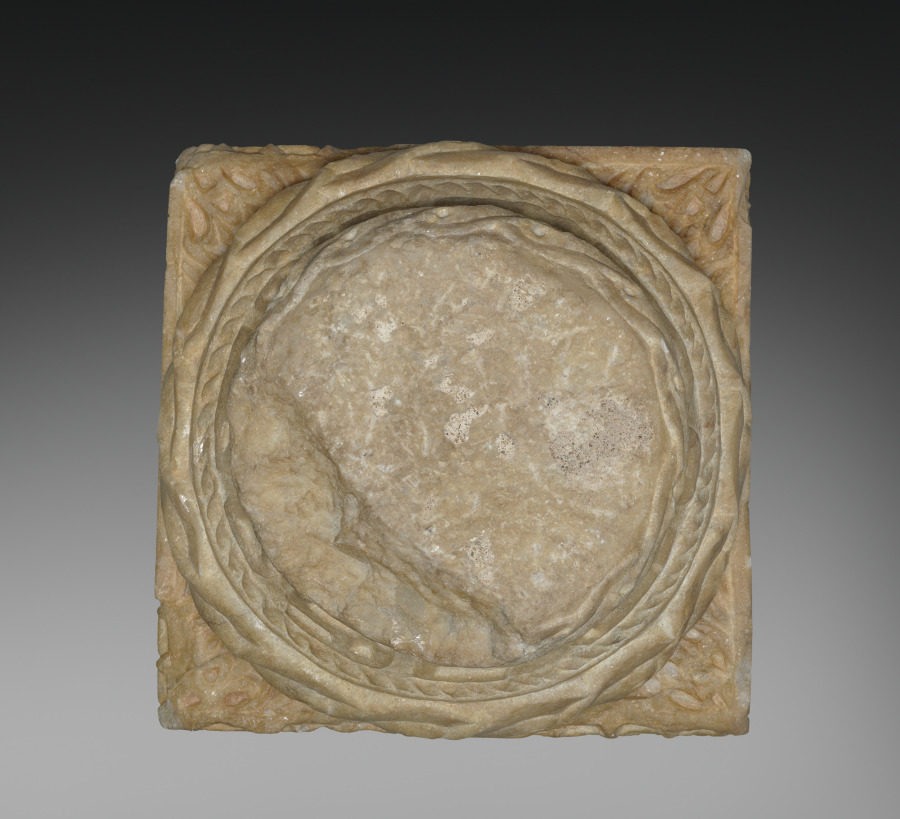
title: Column Base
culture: Spain, Cordoba, Spanish Umayyad period (756–1031)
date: c. 960–76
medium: Marble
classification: Sculpture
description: This base comes from the palatial city of Madinat al-Zahra near Cordoba (Spain) which was begun by caliph Abd al-Rahman III (r. 912–61) around 936. Large parts of the Iberian Peninsula were then under Islamic rule and experienced a cultural flowering. The city, destroyed already in 1010, was the most magnificent palace complex in Europe at the time.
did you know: In the mid-1800s the ruins of Madinat al-Zahra were rediscovered and the source of great fascination as people imagined a palace like that in the stories of 1001 Nights.